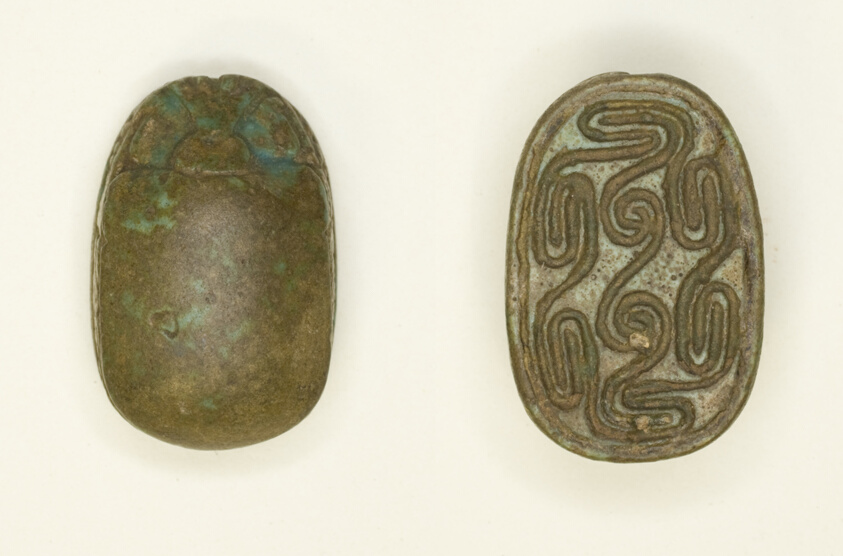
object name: Costume and Accessories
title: Scarab: Interlocking Scrolls and Spirals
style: second intermediate period, fifteenth dynasty, ancient, hyksos, egyptian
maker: Egyptian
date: Second Intermediate Period, Dynasty 15 (about 1650–1550 BCE)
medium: Glazed steatite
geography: Egypt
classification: scarab; ancient art; costume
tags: scarab beetle, spirals, scrolls (motifs)